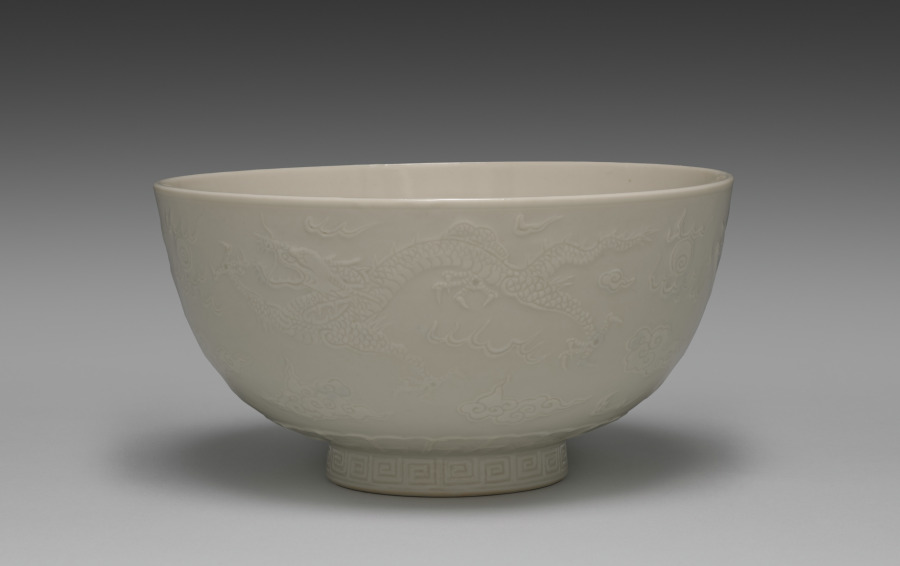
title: Bowl with Dragons Chasing Flaming Jewels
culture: Japan, Meiji period (1868–1912) to Taishō period (1912–26)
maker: Seifū Yohei III (Japanese, 1851–1914)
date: 1893–97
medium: Porcelain with molded and carved design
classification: Ceramic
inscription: 大日本清風造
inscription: 清風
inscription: 清風與平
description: The decoration of this large bowl, described as a donburi on one side of its box, is executed entirely in molded and carved relief under a creamy, pink-tinged translucent glaze. The main motif is a pair of four-clawed dragons pursuing flaming jewels. As is standard for this design, the beasts are surrounded by wisps of cloud, and a foliate pattern runs around the bottom of the basin. A geometric pattern circles the exterior of the footring. The white-on-white design makes the bowl subtle and elegant.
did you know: Kyoto-based Japanese ceramist Seifū Yohei III (1851–1914) admired the glaze colors found on Chinese porcelain and tried to replicate them through intensive experimentation.